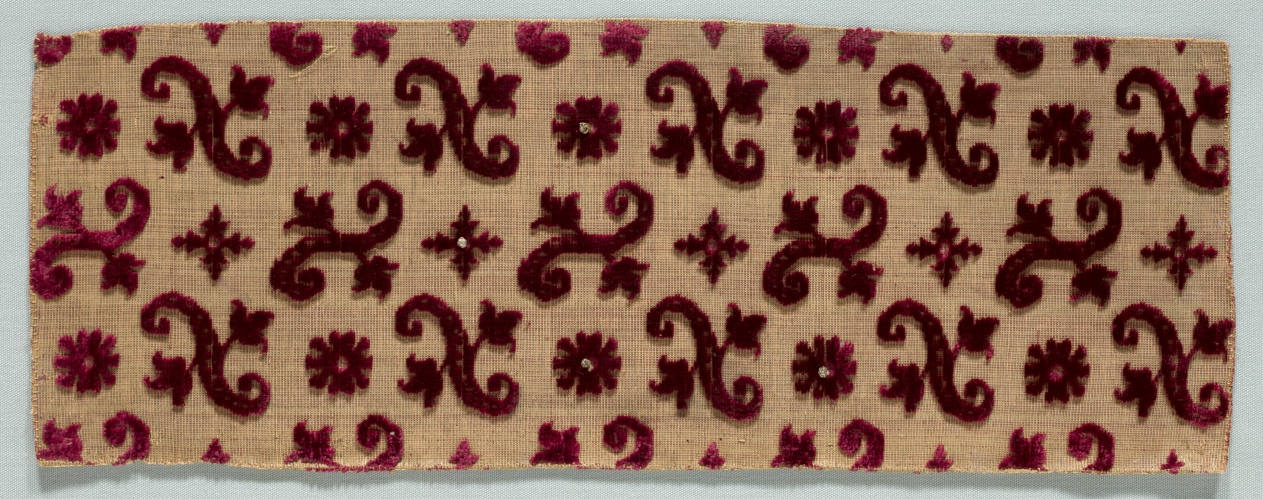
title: Velvet Fragment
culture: Italy, 16th-17th century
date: 1500s - 1600s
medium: velvet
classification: Velvet